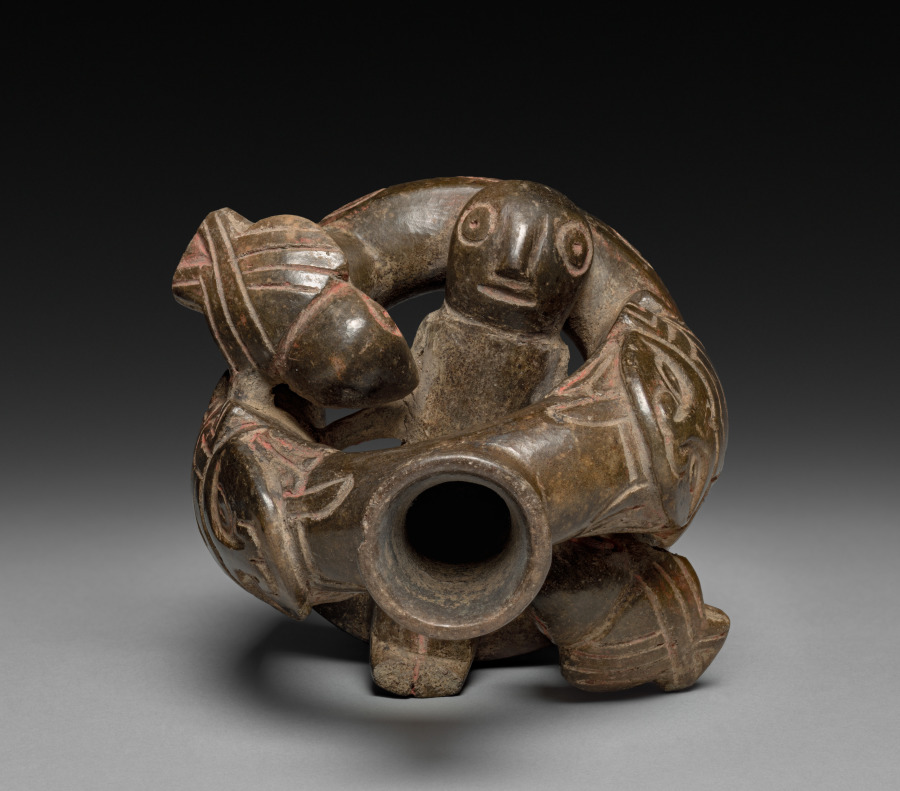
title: Vessel with Reclining Figure and Birds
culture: Andes, north coast, Cupisnique style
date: 2200–200 BCE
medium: Ceramic, pigment (cinnabar?)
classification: Ceramic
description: This ceramic vessel features a supine human being pecked by two birds that perch on the vessel’s doughnut-shaped chamber. The identity of the apparently mythical creature modeled in low relief on the sides of the stirrup-shaped spout is unknown. Little can be said about meaning beyond pointing out an obvious reference to death.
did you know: The stirrup-shaped form of the spout is common among Peruvian ceramics and unique to the ancient Americas.